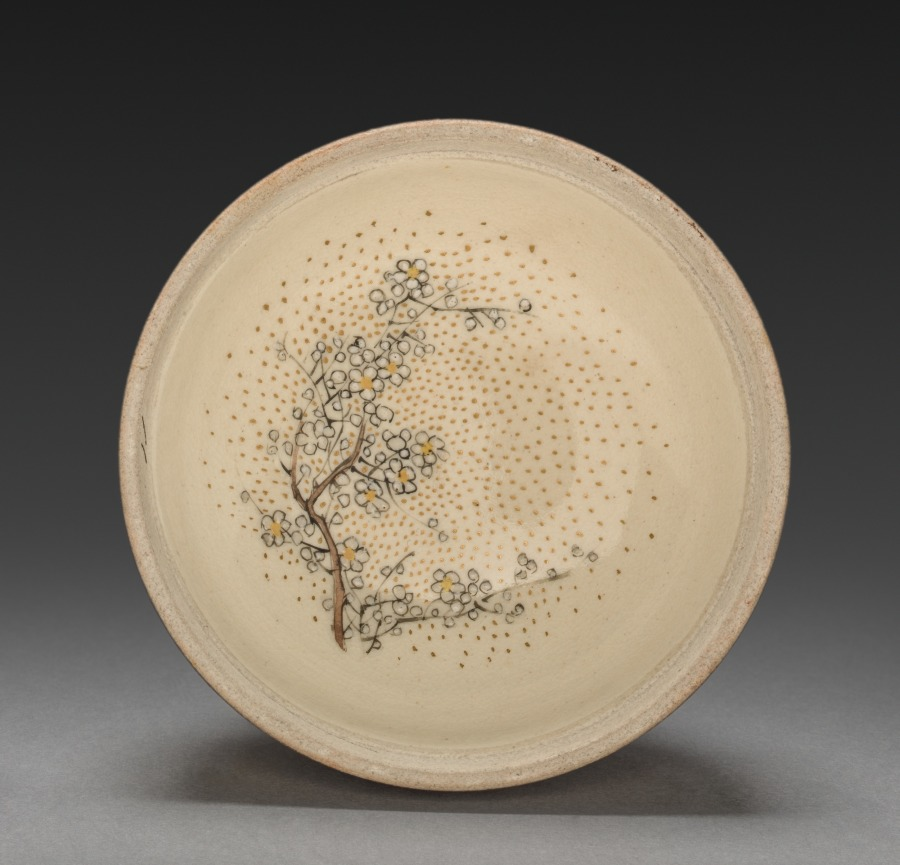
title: Covered Dish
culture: Japan, Meiji period (1868–1912)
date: early 1900s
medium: Kutani ware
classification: Ceramic